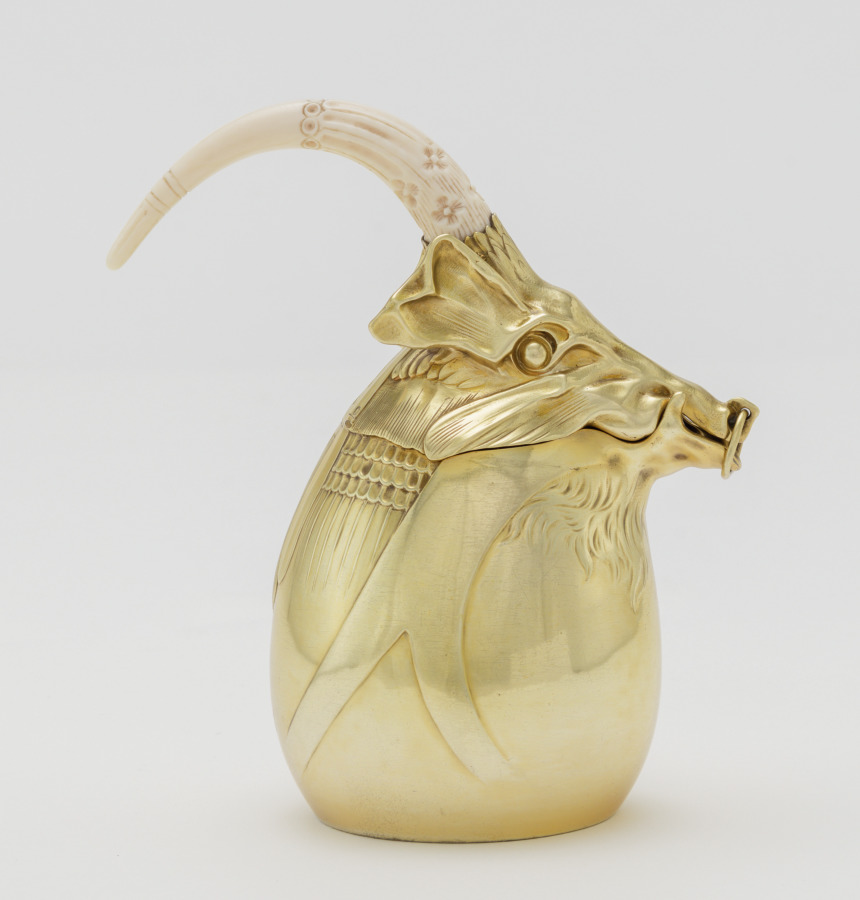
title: Tea Pot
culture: France, Paris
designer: Carlo Bugatti (Italian, 1856–1940)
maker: Adrien-Aurélien Hebrard (French, 1866–1937)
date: c. 1907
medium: Gilt silver and ivory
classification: Silver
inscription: Made by A. A. Hebrard Firm, Paris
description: This tea and coffee service, salver, and table, together with some now missing cups, were all designed by Carlo Bugatti as an ensemble and presented at the 1902 exposition devoted to decorative arts in Turin, Italy. The set was probably acquired from Bugatti's 1907 exhibition at the Galerie Hébrard in Paris by a wealthy South African widow, Anna Blake, who was living there at the time. Some of the animal and insect motifs suggest mythical beasts or the fossils of prehistoric animals. When Mrs. Blake returned to Cape Town, she took these and other pieces designed by Bugatti with her, and they remained in South Africa throughout her lifetime.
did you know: This tea pot is part of a tea and coffee service designed by Carlo Bugatti.